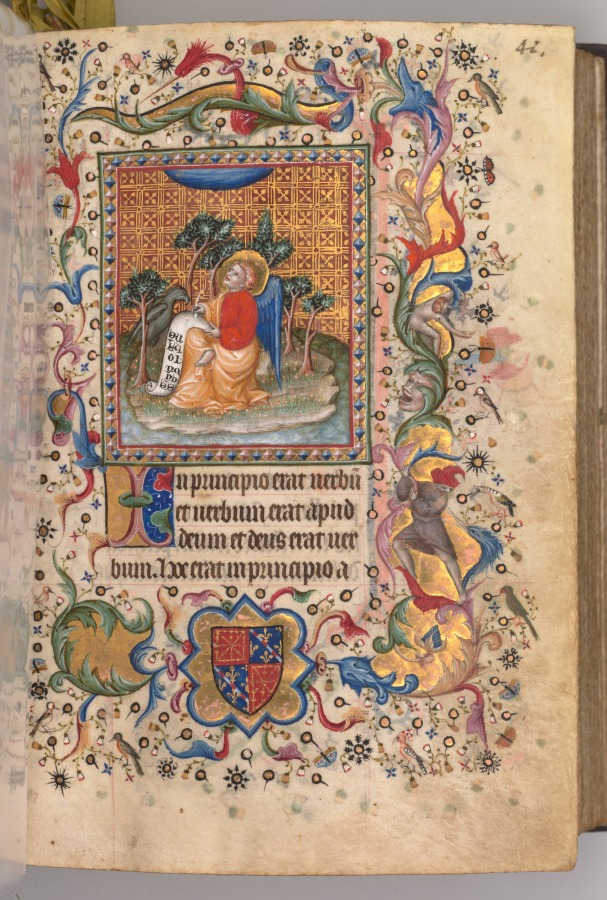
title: Hours of Charles the Noble, King of Navarre (1361-1425): fol.1r, St. John the Evagelist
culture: France, Paris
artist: Master of the Brussels Initials and Associates (French)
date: c. 1405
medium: ink, tempera, and gold on vellum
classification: Bound Volume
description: This precious volume was obviously highly prized by its owner, the French-born King of Navarre, who had his coat of arms painted on no less than twenty folios. Rather than directly commissioning this manuscript from a specific workshop, it seems that Charles the Noble acquired his book of hours -- perhaps ready-made for the luxury market -- while on a trip to Paris in 1404-05. A collaborative effort, six painting styles are evidenced within the pages of this codex, those of two Italians, two Frenchmen, and two Netherlanders. The painter who was responsible for the planning and decoration of the book, and who produced seventeen of the large miniatures, was a Bolognese artist known as the Master of the Brussels Initials. His principal assistant, responsible for most of the borders, was a Florentine who signed his name "Zecho" da Firenze on folio 208 verso.